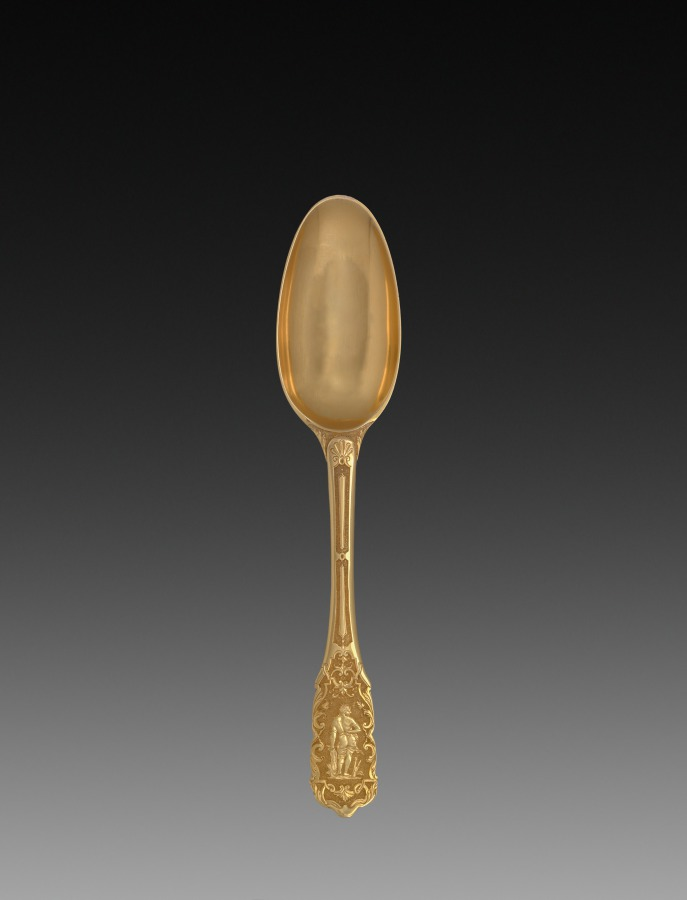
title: Spoon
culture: Germany, Augsburg(?), 18th century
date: c. 1725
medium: gold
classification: Metalwork